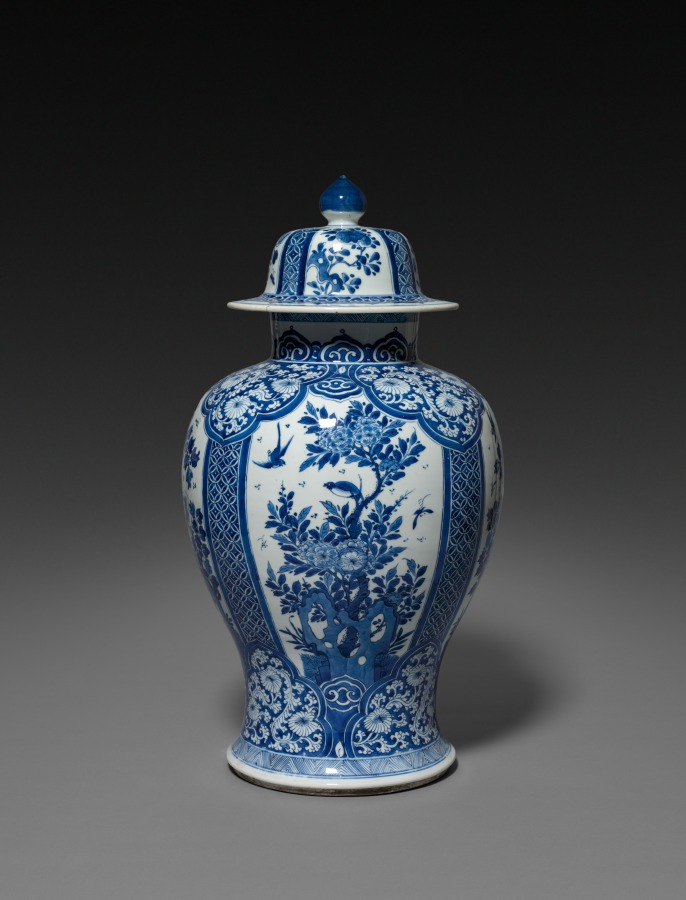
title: Vase with Cover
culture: China, Jiangxi province, Jingdezhen kilns, Qing dynasty (1644–1911), Kangxi reign (1662–1722)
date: 1662–1722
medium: porcelain with underglaze blue decoration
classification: Ceramic